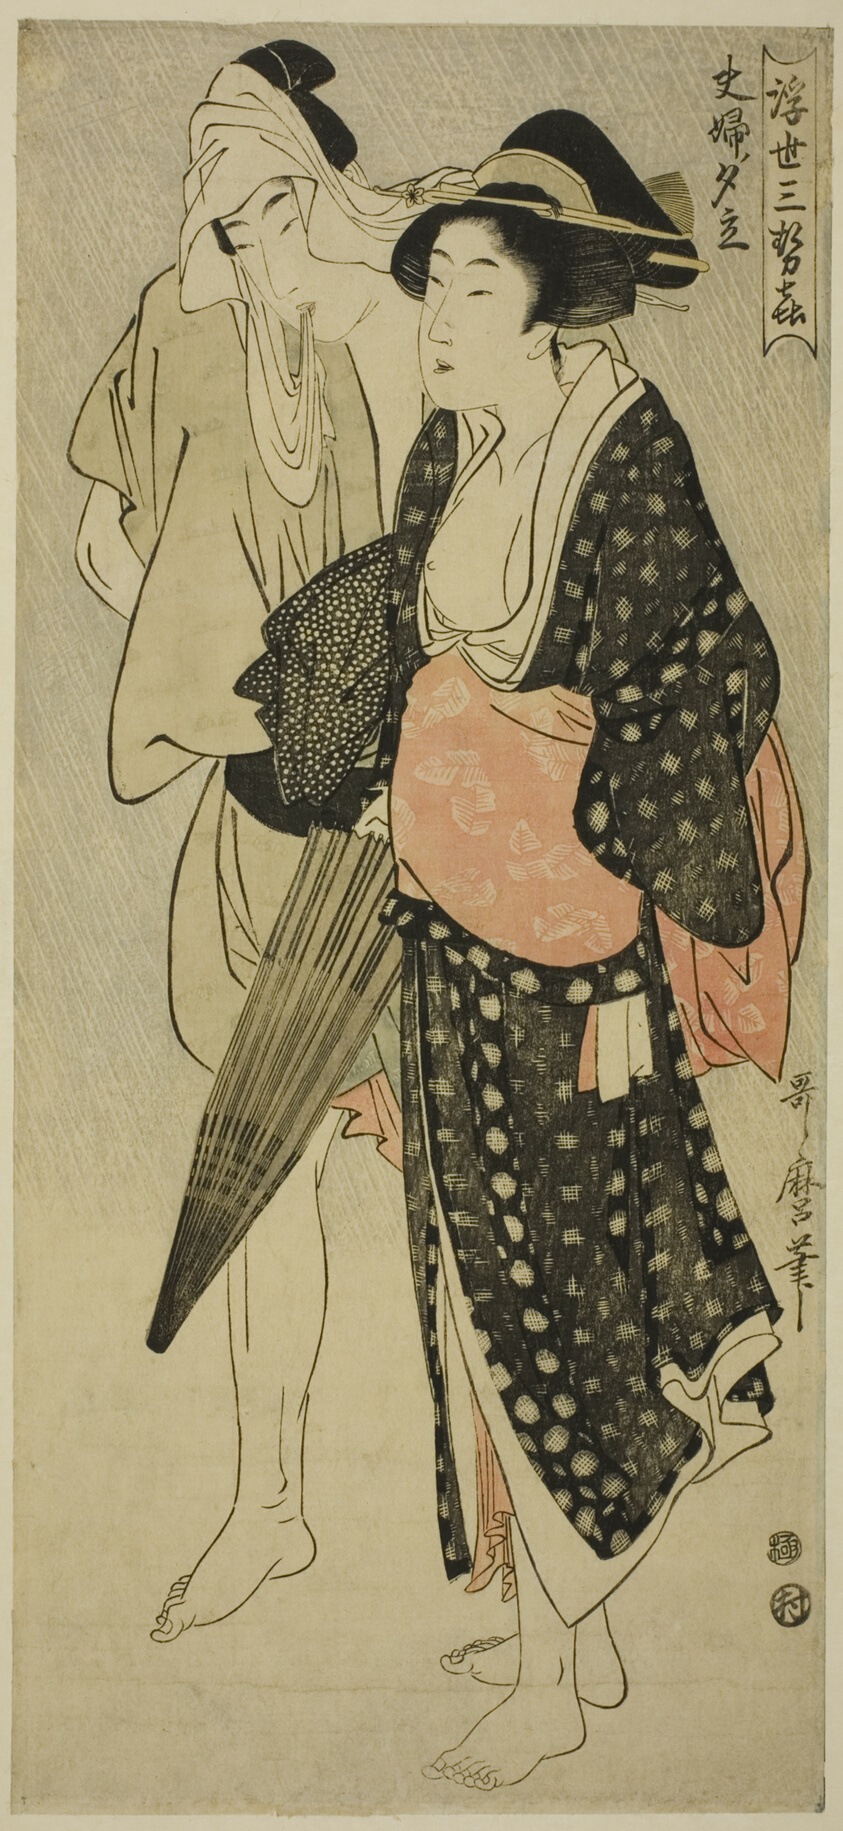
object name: Print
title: Husband and Wife Caught in an Evening Shower (Fufu no Yudachi), from the series "Three Evening Pleasures of the Floating World" ("Ukiyo San Seki")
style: Japanese (culture or style)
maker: Kitagawa Utamaro 喜多川 歌麿; Japanese, 1753 (?)-1806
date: c. 1800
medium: Color woodblock print; naga-oban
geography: Japan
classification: print; asian art